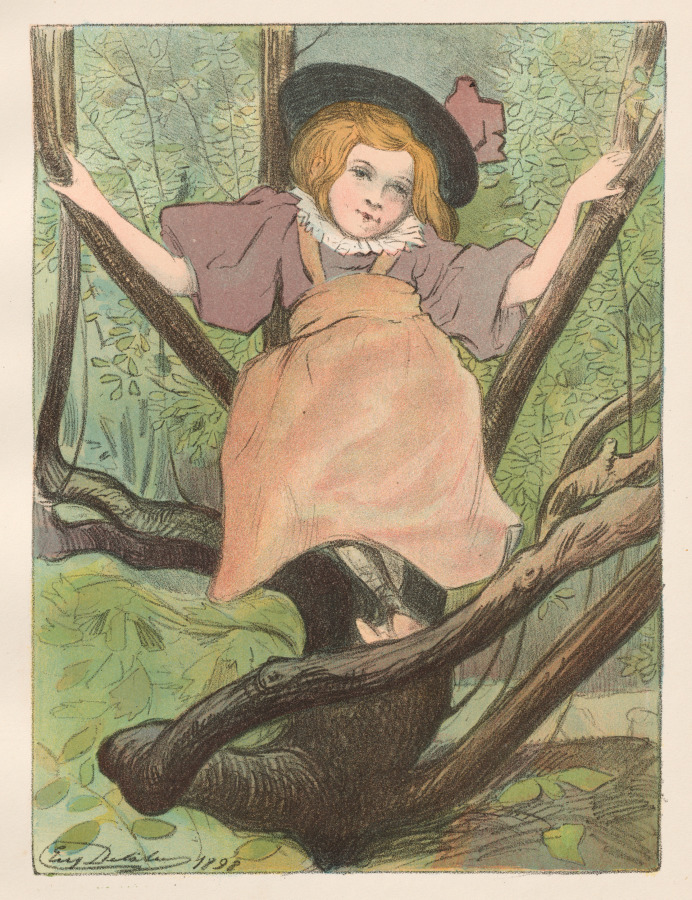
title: Kacia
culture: France, Paris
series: L'Estampe Moderne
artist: Eugène Delâtre (French, 1864–1938)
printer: Imprimerie Champenois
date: 1898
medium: Color lithograph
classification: Bound Volume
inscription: In plate: lower left corner of image: Eug Delatre 1898; lower right corner: blindstamp of l'Estampe Moderne (Lugt 2790)